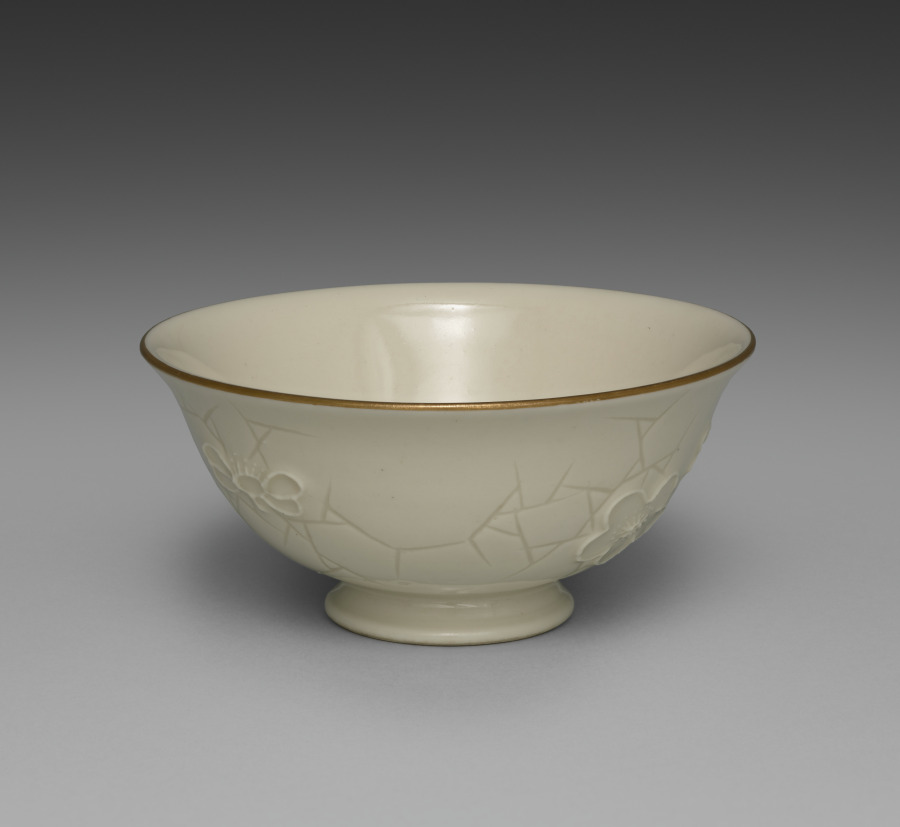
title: Bowl from Dining Set with Plum Blossoms and Cracked-Ice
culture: Japan, Meiji period (1868–1912)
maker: Seifū Yohei II (Japanese, 1844–1878)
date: c. 1875–78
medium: Porcelain with molded designs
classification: Ceramic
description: Each item in this set has a delicate low-relief design of flowering plum branches over scattered, intersecting lines meant to resemble the cracked-ice surface of a frozen body of water and is signed on the base in gold pigment. While Yohei II produced many fine works in underglaze blue, like those produced by Kiyomizu Shichibei, he also made works in quite different styles later in his career, from the early 1870 s. In 1873, he was appointed purveyor to the Industrial Center of Kyoto Prefecture, a designation associated with Kyoto’s efforts to reach an international market through the port of Kobe; and from 1875 until his death, he was involved in national-level projects to present Japanese ceramics across the world. It was during this period that Yohei III was apprenticed to Yohei II, and it has been suggested that this set may in fact be an early example of Yohei III’s work, which he signed with his teacher’s name. Decorated with flowers resembling Japanese textile motifs, the set calls to mind the design of Yohei II’s pair of vases with plum blossoms in the Victoria and Albert Museum. Here, the elaborate trees created for a formal public exhibition setting have been translated into the approachable blossoms of the genteel domestic environment. While the designs are consistent across the pieces, each raised flower petal and pistil and each incised line in the ice was done by hand, so the cups, bowls, and dishes are similar yet unique. The bottoms of two boxes once identified the set’s owner, but the information has been deliberately obscured with black ink. However, inscriptions still visible appear to indicate two occasions, once at the end of July 1886 , and once again in June 1916 , when parts of the set were requested from Hokura in Niigata Prefecture. The location corresponds to a neighborhood in the present-day city of Jōetsu. The surname Tsuji 辻 also appears on a paper tag affixed to one of the box cloths. Future research may possibly reveal more about their provenance. A vase by Yohei III in a private collection combines the formal grandeur of the Yohei II vases in the Victoria and Albert Museum with the gentler design of this dining set, placing flowering plum trees against soft, scalloped-edge clouds resembling those in golden screens.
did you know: The dining wares have a creamy white coloration that the four boxes containing them identify as Korean in style.